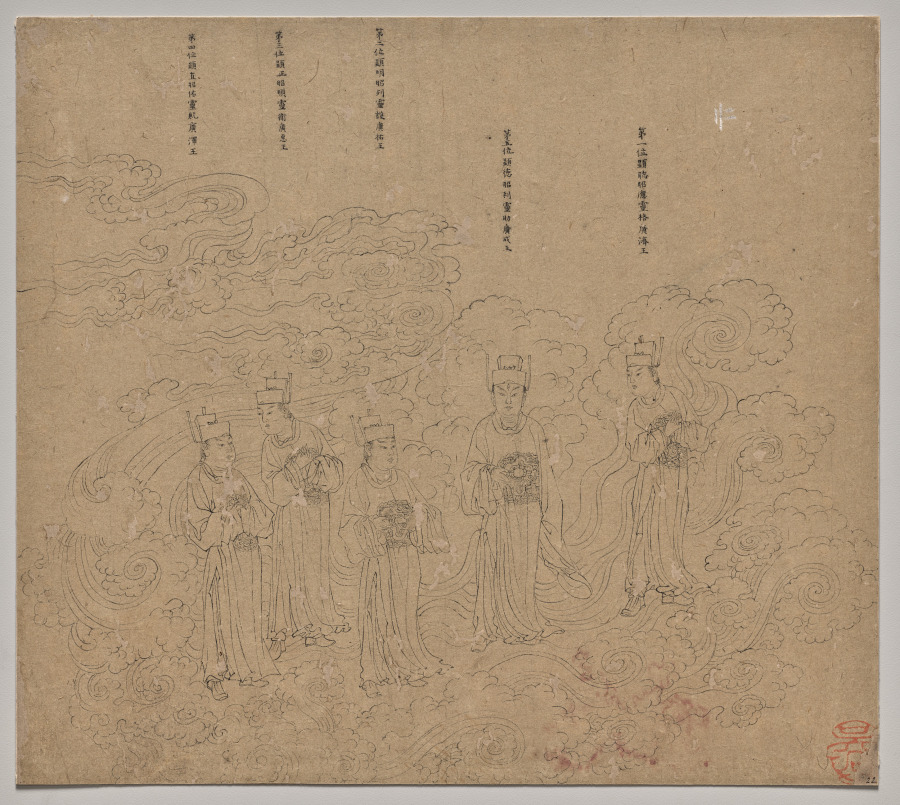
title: Album of Daoist and Buddhist Themes: Procession of Daoist Deities: Leaf 22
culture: China, Southern Song dynasty (1127-1279)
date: 1200s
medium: Album, ink on paper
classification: Painting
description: This leaf is part of an important album of 50 drawings encompassing three subjects: processions of Daoist deities to the celestial spheres, the Ten Kings of Hell, and Erlang’s Campaign to Rid Mount Guankou of Dangerous Beasts (soushan tu 搜山圖). This section of the Daoist pantheon shows a group of “kings” known as the Five Manifestations (right to left): Guangji 廣濟王, Guangcheng 廣成王, Guangyou 廣祐王, Guanghui 廣惠王, and Guangze 廣澤王. The artist chose for an unknown reason to put the fifth king, Guocheng, between kings number 1 and number 2.